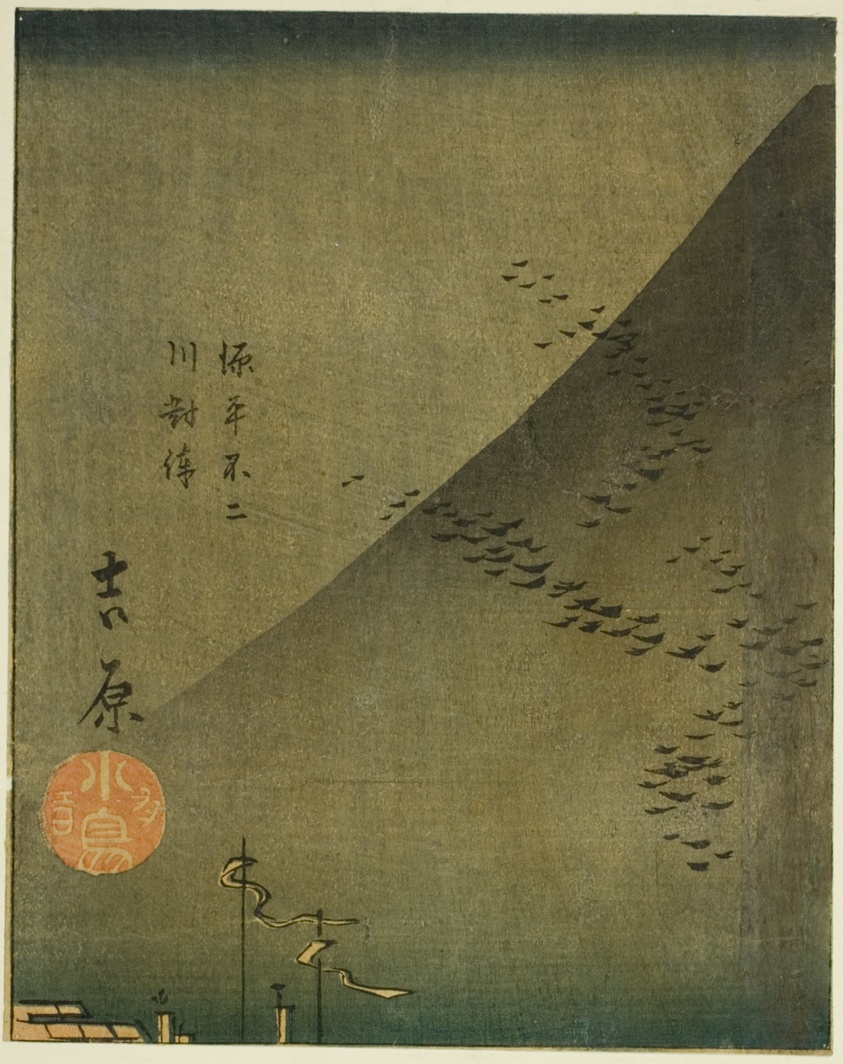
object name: Print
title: Yoshiwara, section of sheet no. 4 from the series "Cutouts of the Fifty-three Stations (Gojusan tsugi harimaze)"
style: Japanese (culture or style)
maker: Utagawa Hiroshige 歌川 広重; Japanese, 1797-1858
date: 1852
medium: Color woodblock print; section of harimaze sheet (uncut sheet: 1939.1293)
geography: Japan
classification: woodblock print; print; asian art